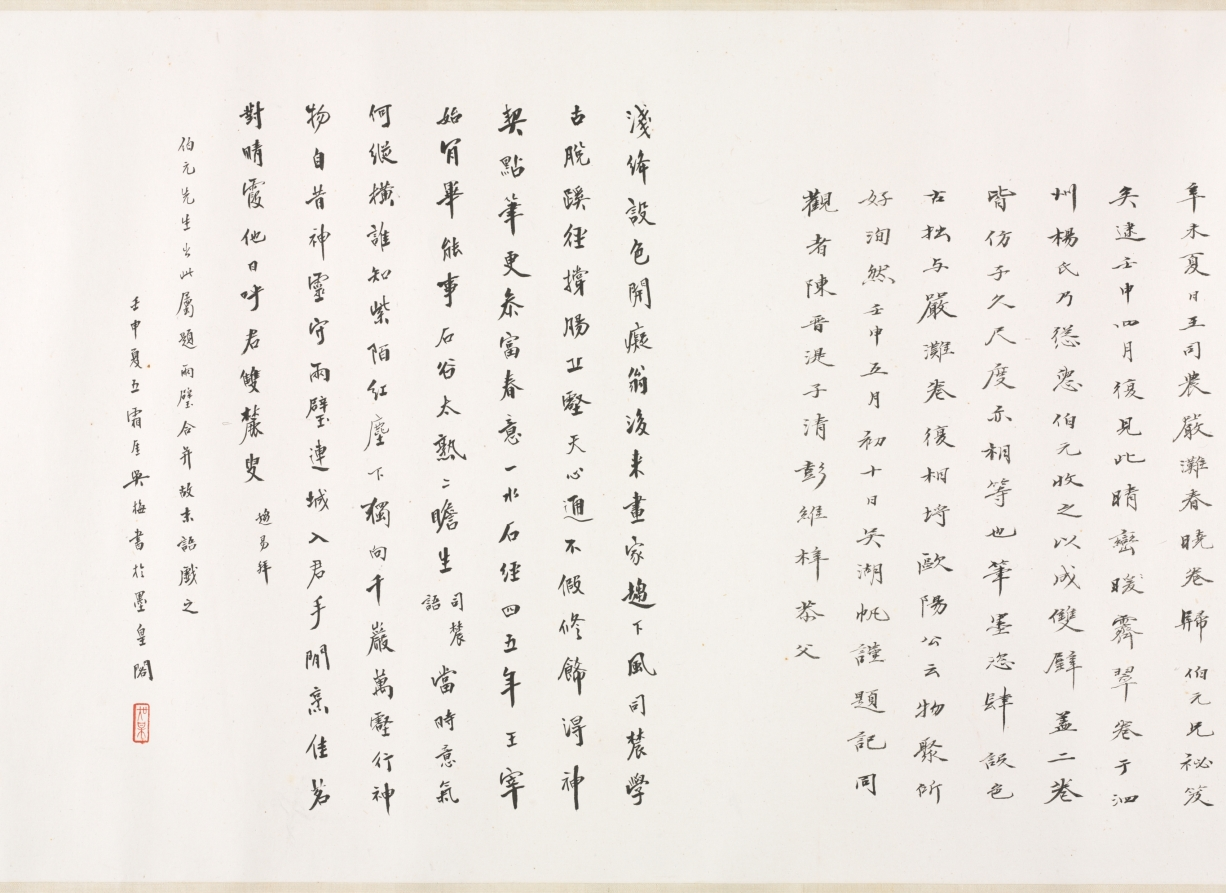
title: Green Peaks under Clear Sky: After Huang Gongwang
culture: China, Qing dynasty (1644-1911)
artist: Wang Yuanqi (Chinese, 1642–1715)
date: 1703–8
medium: handscroll; ink and light color on paper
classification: Painting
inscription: 晴巒霽翠：倣黃子久。麓臺。[印]石師道人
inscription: [印] 御書畫圖留與人看. 子久畫於宋諸大家荊、關、李、范、董、巨，無所不有。運筆不假修飾。皴法由淡入濃，化諸家之迹者也。澹明徐君偶見縮本，臨摹六幅。囑余參以富春大意，成一長卷。余夙夜在公，乘暇偶一點染。至戊子九秋告竣，閱四、五年矣。昔大癡為無用師作富春卷，七年而成，為千古鉅觀。今拙筆癡鈍。亦淹留至此。可為識者噴飯矣。王原祁題。[印]王原祁印; 麓臺 [印, 畫芯左下] 西廬後人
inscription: 3 additional colophons and 15 additional seals: 1 colophon and 9 seals of Yang Shicong 楊士驄 (b. 1870); 1 colophon of Wu Hufan 吳湖帆 (1894–1968); 1 colophon and 1 seal of Wu Mei (20th c.); 5 seals of Cheng Qi 程琦 (1911–1988).